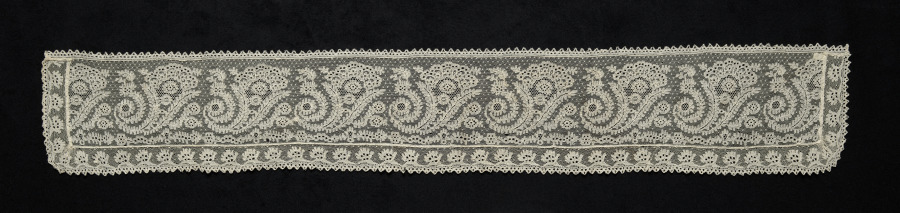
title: Lace Cap Piece(?)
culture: France, Lille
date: 1800s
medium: Bobbin lace (Lille lace)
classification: Lace